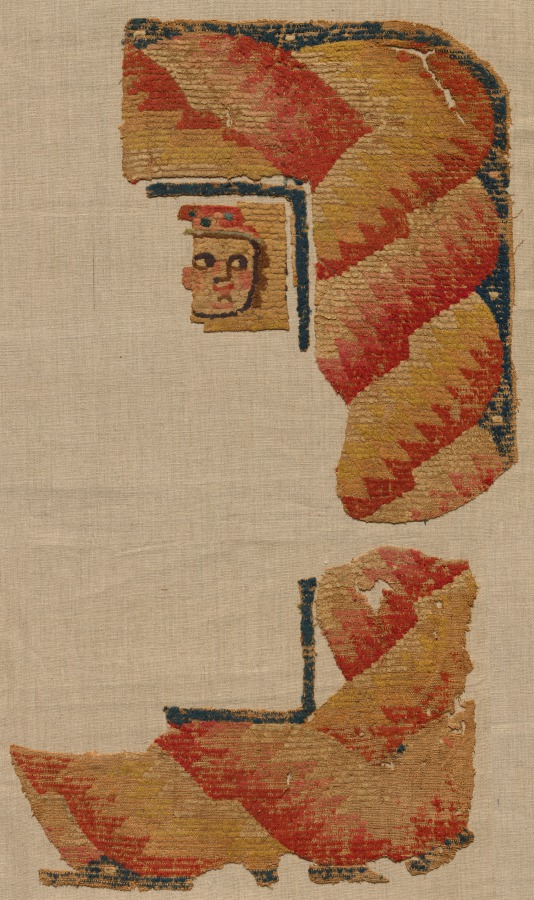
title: Fragment, Probably an Ornament from a Large Curtain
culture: Egypt, Byzantine period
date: late 400s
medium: looped-weft weave; linen and wool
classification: Textile